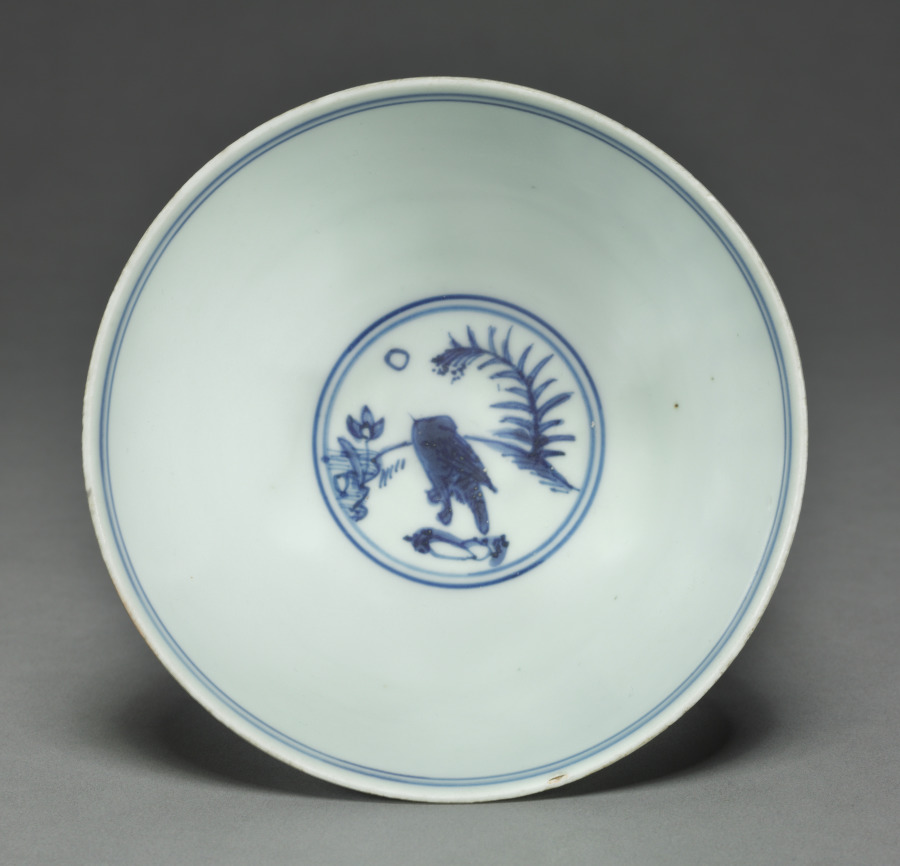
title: Bowl with Ducks over Lotus Pond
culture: China, Jiangxi province, Jingdezhen kilns, Ming dynasty (1368-1644), Wanli reign (1573-1620)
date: 1573–1620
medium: porcelain with underglaze blue decoration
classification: Ceramic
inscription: 永保長春